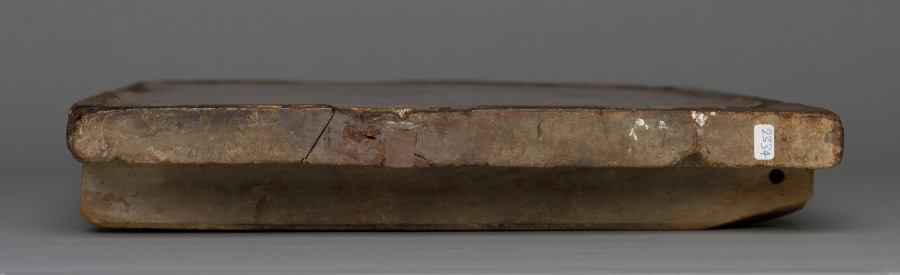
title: Icon of the New Testament Trinity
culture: Byzantium, Constantinople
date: c. 1450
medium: Tempera and gold on wood panel (poplar)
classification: Painting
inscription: Ο ΠΑΛΑΙΟC ΤΗΩ- God the Father as Christ in old age on right identified on either side of his head in gold, outlined in red.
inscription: ΤΟ ΑΙΟΝ ΠΝΑ- The Holy Spirit, identified by dove in gold outlined in red.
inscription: ΙΩCHΦ Ο ΠΟΙΗΤΗC- St. Joseph the Hymnographer identified on the left by gold letters, outlined in red.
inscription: ΚΟCΜ Ο ΠΟΙΗΤΗC- St. Kosmas the Hymnopgrapher identified on the right in gold letters in red outline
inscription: "'together with...you my God' and 'your dominion" in Scroll of Kosmas on the right.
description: This icon depicts an important subject in Orthodox Christian art, the three corresponding figures of the single godhead known as the Holy Trinity. The Trinity is represented here in a composition known as the “New Testament Trinity,” which features Christ and God the Father seated on a bench with a dove representing the Holy Spirit between them. The central field is occupied by a large wooden throne with gold highlights on which Christ (left) and the Ancient of the Days (God the Father as Christ in old age) are seated. The Holy Spirit, in the form of a dove, hovers within an eight-pointed star that signifies the eighth day, the future eon. On either side of the Trinity are two hymnographers, authors of hymns of praise, both identified by gold letters outlined in red—Saint Kosmas (about 675–752) on the left and Saint Joseph (about 812/818–about 886) on the right. They both suspend scrolls from round-arched windows. The icon likely was part of a church templon, the barrier that separated the nave from the sanctuary in an Orthodox church. It is not signed or dated; however, careful analysis of the painting’s style and technique places it in Constantinople around 1450, just prior to the city’s fall to the Ottomans in 1453. It represents a moment when Byzantine painting reached a brilliant crescendo.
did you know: More than just a breakfast food, eggs are used to make the tempera paint used in this painting.